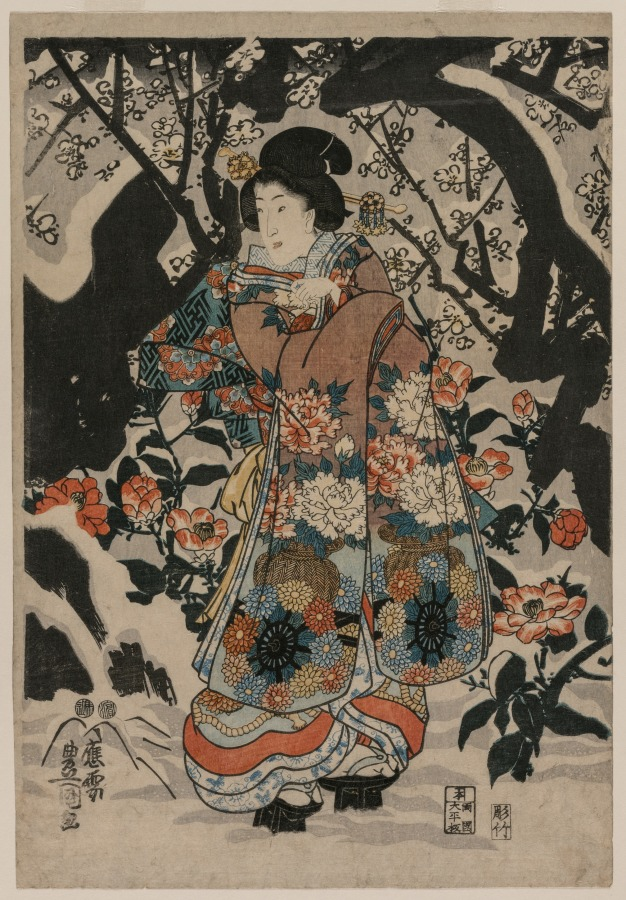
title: Woman Standing Beside a Plum Tree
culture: Japan, Edo period (1615–1868)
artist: Utagawa Kunisada (Japanese, 1786–1865)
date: c. 1850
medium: color woodblock print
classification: Print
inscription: Artist's Signature: Ōju (motome ni ōjite) Toyokuni ga.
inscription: Publisher: Daikokuya Heikichi (Daihei han, Ryogoku, emblem). Engraver: Hori Take. Censorship Seal: Hama, Magomi.